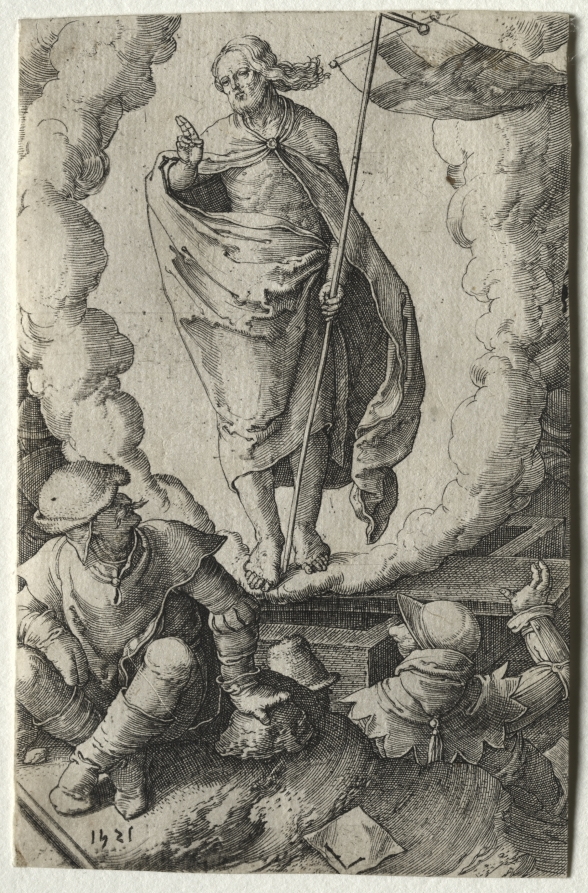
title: The Passion: The Resurrection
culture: Netherlands, 16th century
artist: Lucas van Leyden (Netherlandish, 1494–about 1533)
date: 1521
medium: engraving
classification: Print